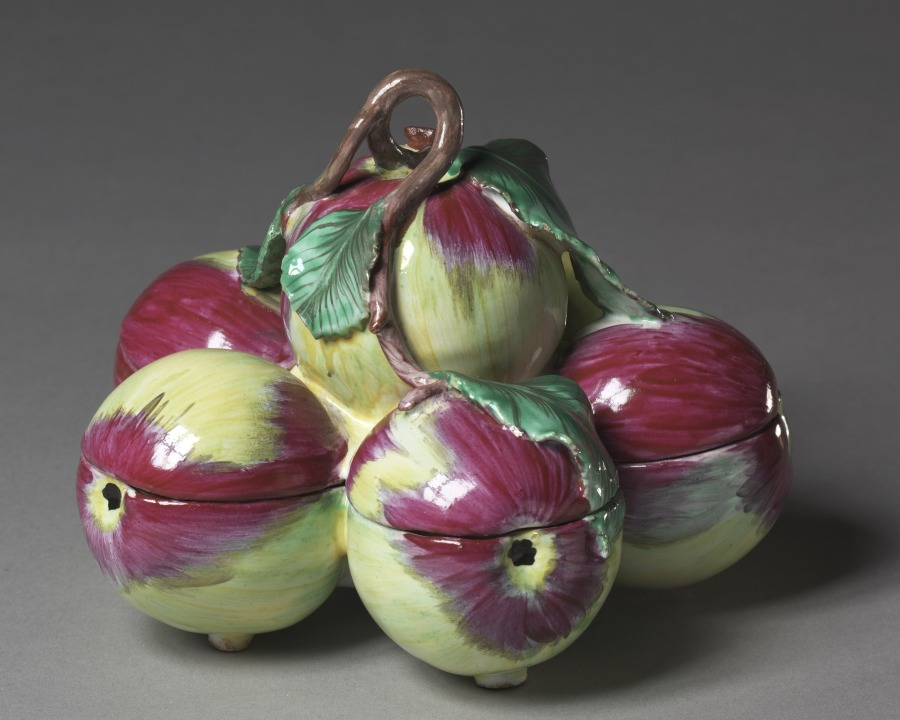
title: Covered Box in the Form of Apples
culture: France, 18th century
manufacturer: Sceaux Factory (French, active 1748–66)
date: c. 1760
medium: Tin- glazed earthenware (faience) wth enamel decoration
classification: Ceramic